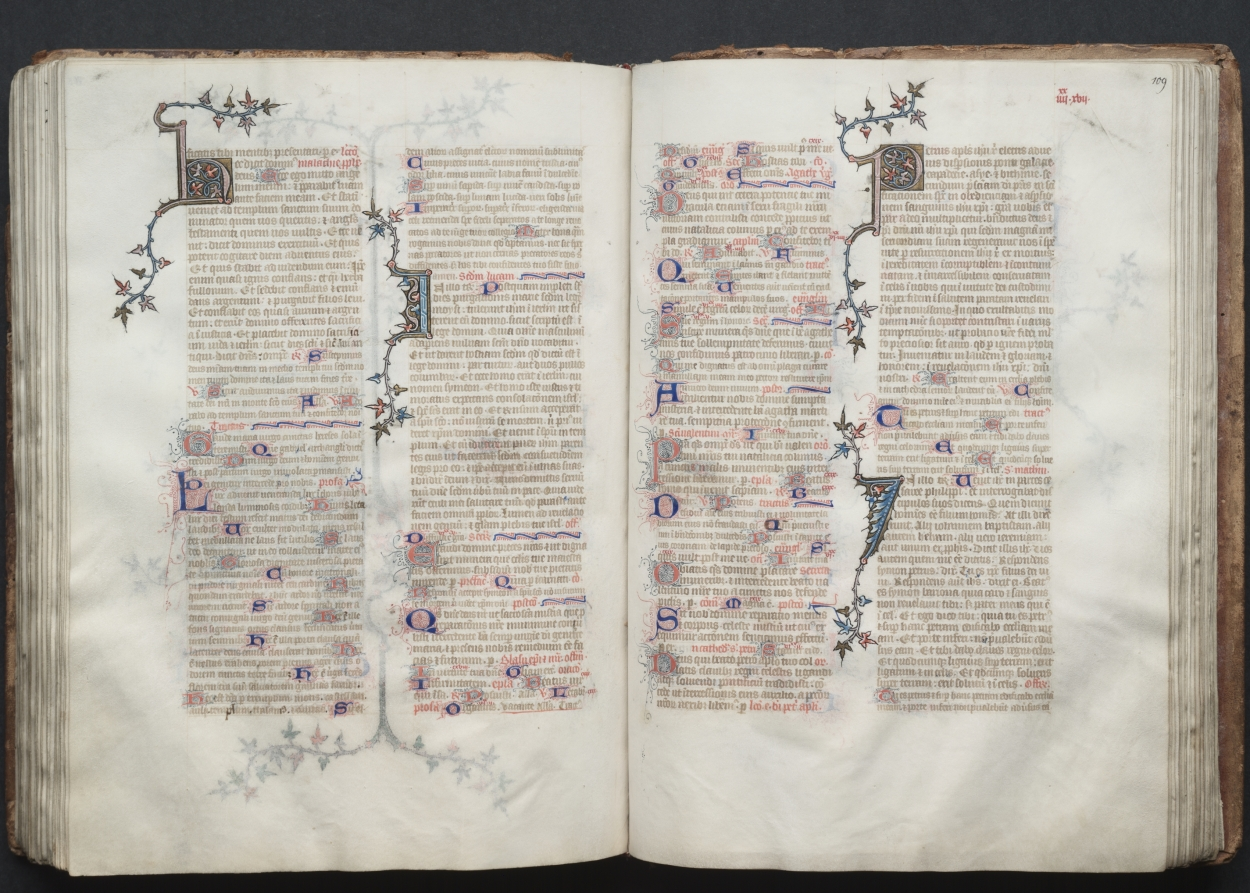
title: The Gotha Missal: Fol. 109r, Text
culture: France, Paris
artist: Master of the Boqueteaux (French)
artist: and Workshop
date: c. 1375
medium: ink, tempera, and gold on vellum; blind-tooled leather binding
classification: Bound Volume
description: The style and quality of this manuscript's decoration is typical of deluxe Parisian books made for aristocratic or royal patrons. Most of the book's decoration appears to be the work of the Master of the Boqueteaux, an artist active at the court of King Charles V (died 1380). His style was apparently shared by a number of book illuminators working in and around Paris. It is very possible that the Gotha Missal belonged to Charles V, but is not provable because the manuscript has no royal portraits and lacks a colophon. Given the book's magnificent decoration, however, it would seem that it was produced for a Valois prince, if not for the king himself. The manuscript receives its name from the German dukes of Gotha, its later owners.